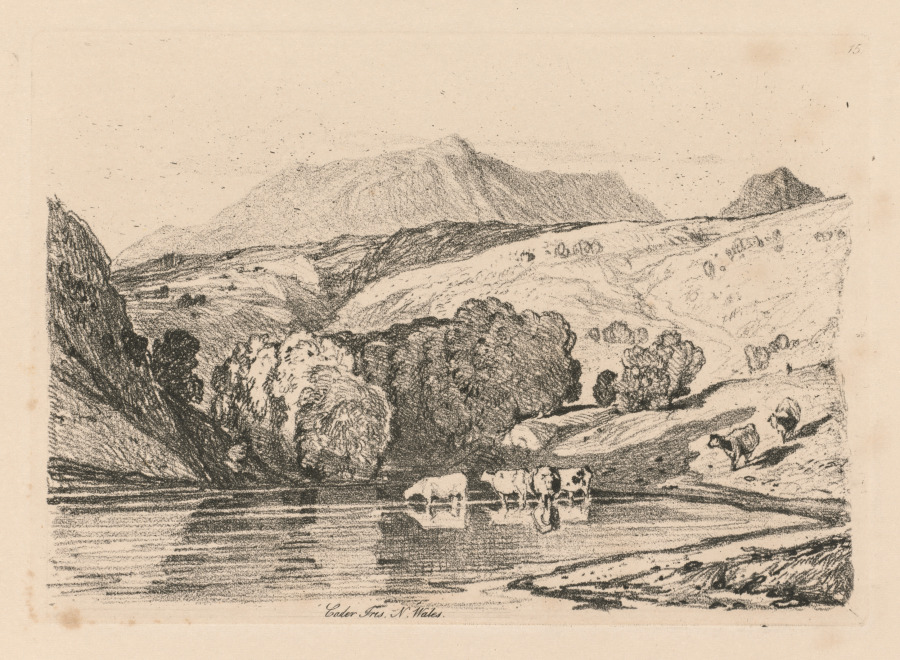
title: Liber Studiorum: Plate 15, Cader Iris, North Wales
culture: England, 19th century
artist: John Sell Cotman (British, 1782–1842)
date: 1838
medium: softground etching, from a bound volume containing 48 plates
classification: Bound Volume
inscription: In plate, within image, upper right: 15; in plate, below image: Cader Iris, N. Wales